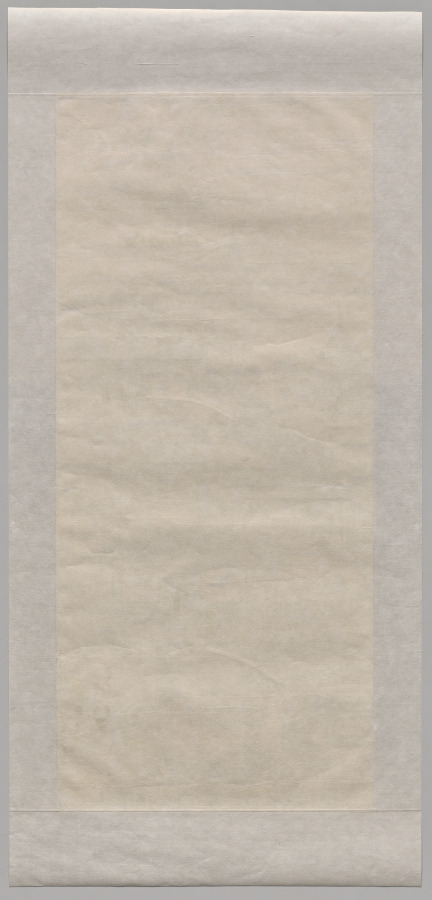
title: First Part of Story of The Western Chamber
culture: China, Qing dynasty (1644–1911), Qianlong reign (1736–95)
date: 1736–95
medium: Polychrome woodblock print; ink and color on paper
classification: Print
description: In the 1600s, printing flourished in such Jiangnan cities as Nanjing, Suzhou, Hangzhou, and Huizhou, evolving from privately enjoyed illustrated books printed in color to more commercialized single-sheet color prints that were hung on walls and became part of the rich urban visual culture.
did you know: Woodblock printing in color reached a height in China in the 1600s to 1700s. The prints were executed by means of sets of separate blocks, each carved to print a different color.